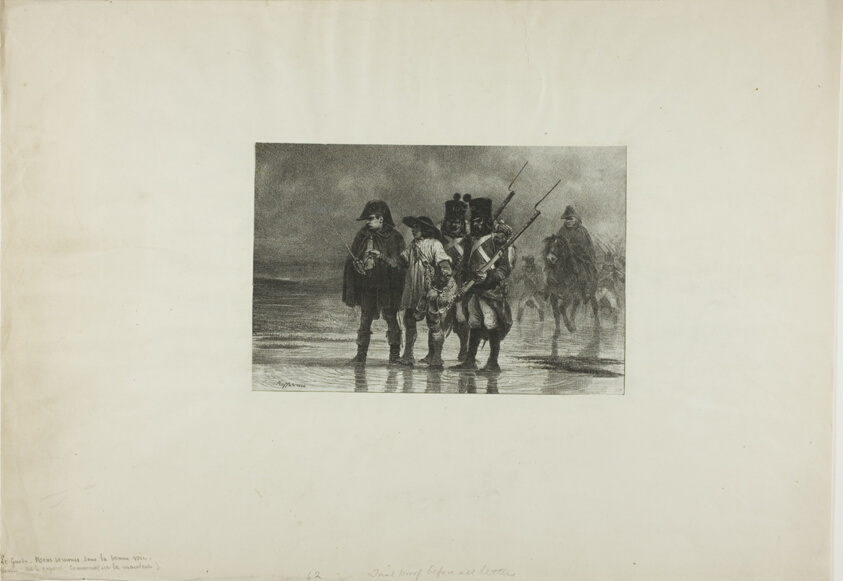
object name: Print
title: The Guide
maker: Denis Auguste Marie Raffet (French, 1804-1860)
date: 1836–37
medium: Lithograph in black on ivory chine laid down on cream wove paper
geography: France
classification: lithograph; print; prints and drawing